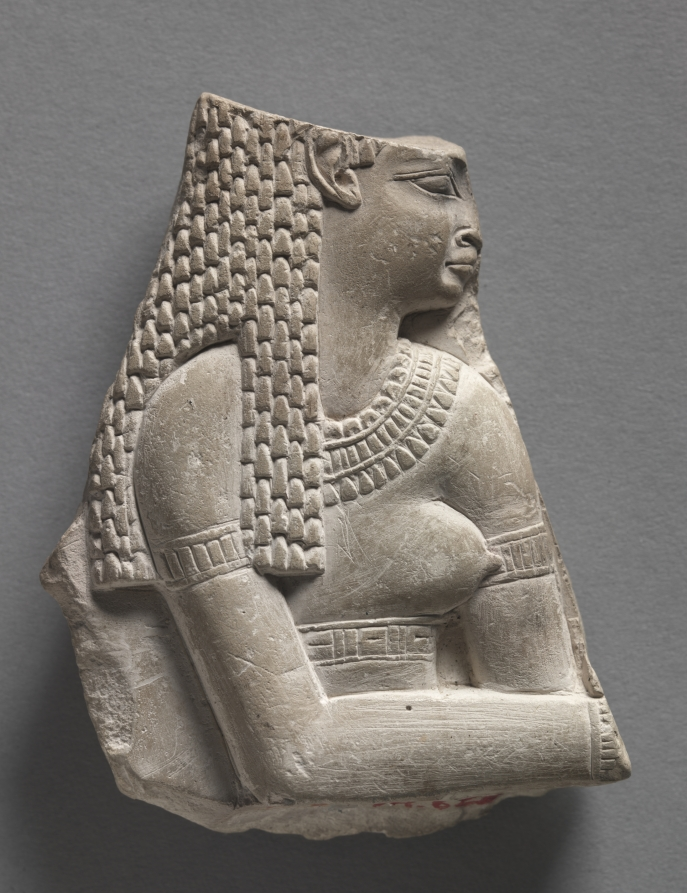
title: Double-Sided Votive Relief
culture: Egypt, Greco-Roman period (332 BCE–395 CE), Ptolemaic dynasty (305–30 BCE)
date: 305–30 BCE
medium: limestone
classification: Sculpture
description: Trial pieces—carved on limestone flakes, or ostraca—and sculptors' models allow us to see how the ancient Egyptian artist approached his work. Showing a wild dog's head on one side and a profile figure on the other, these pieces are masterpieces in their own right, and were probably meant to be copied.